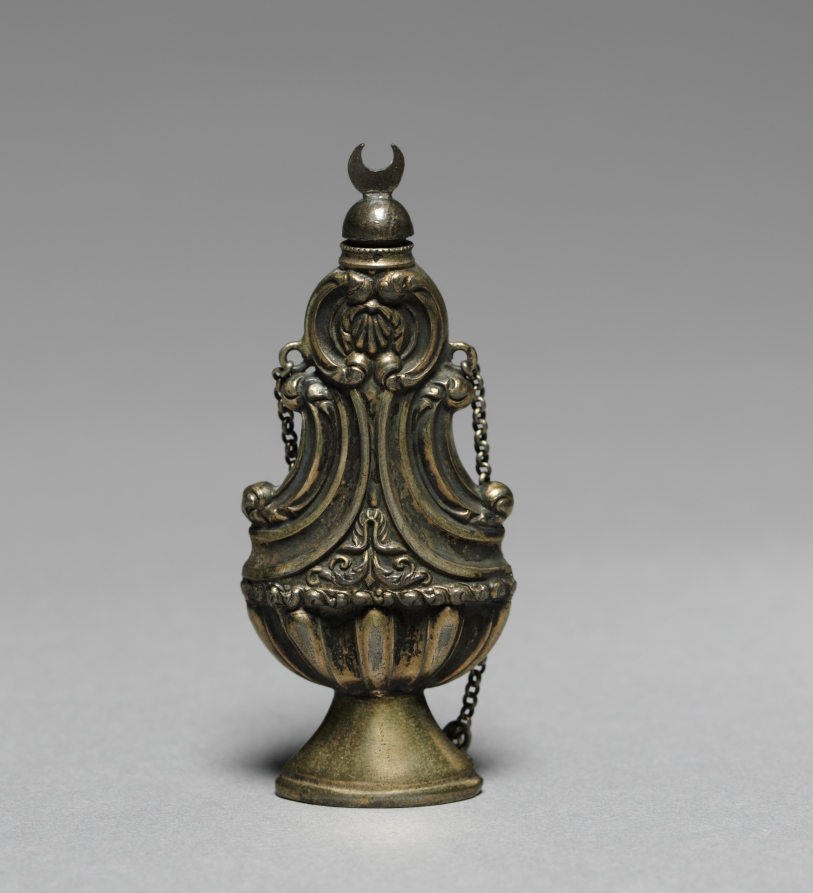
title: Scent Bottle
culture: France, mid-19th century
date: mid-1800s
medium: silver gilt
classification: Miscellaneous